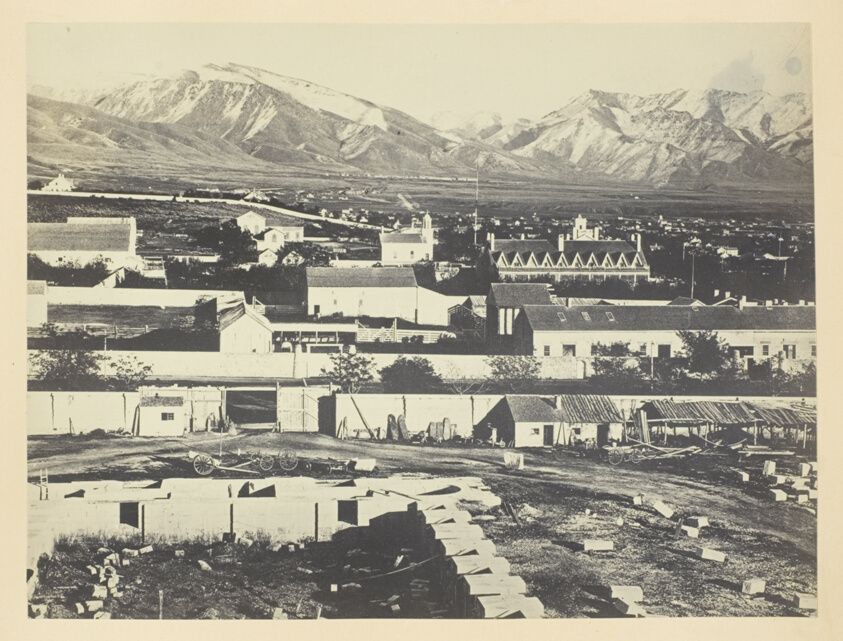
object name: Photograph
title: Salt Lake City, Camp Douglas and Wasatch Mountains in the Background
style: 19th century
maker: Andrew J. Russell; American, 1830–1902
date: 1868/69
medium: Albumen print, pl. XXVI from the album "Sun Pictures of Rocky Mountain Scenery" (1870)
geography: United States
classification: photograph; albumen silver print; photography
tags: Collected by Hugh Edwards